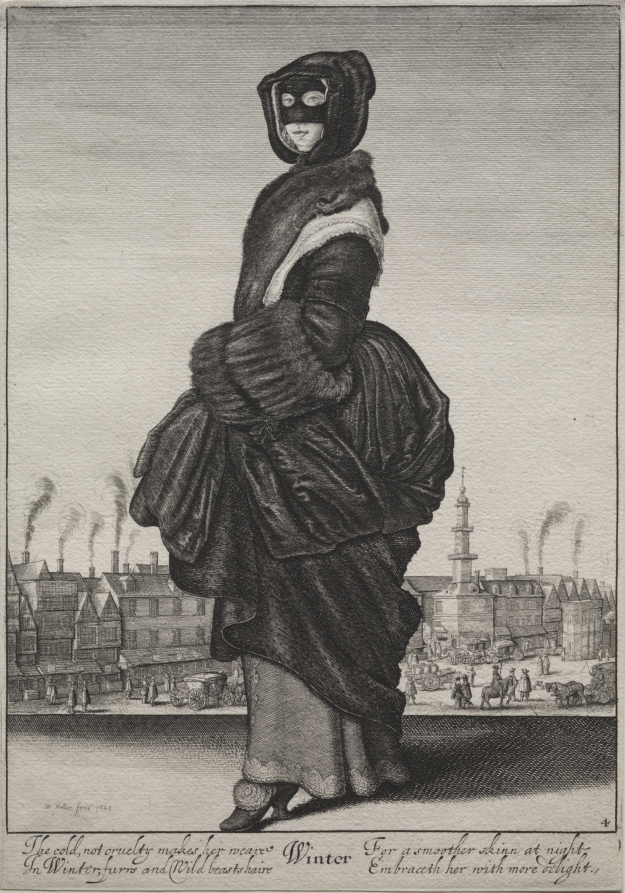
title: Winter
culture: Bohemia, 17th century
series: The Seasons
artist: Wenceslaus Hollar (Bohemian, 1607–1677)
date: 1643–44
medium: etching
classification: Print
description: Increments of time, such as the seasons, were one of the most popular subjects for printed sets. Wenceslaus Hollar alone made six different versions. Hollar was a professional printmaker with over 3,000 prints to his credit. Born in Bohemia, he worked in Germany, London, and Antwerp. He came to London in 1636 while in the employ of the Earl of Arundel, an important collector that Hollar met in Germany. Apparently free to pursue independent projects, Hollar designed and etched this series around 1643–44. Here, each season is personified by elegantly clad ladies, appropriately dressed for their particular climate, with recognizable landmarks in and around London in the backgrounds. The inscriptions, in an older version of English, are slightly suggestive, in keeping with the lighthearted character of the imagery. The building on the extreme right is the Tun. It was built in 1283 and served as a lockup for drunks and other public offenders. The inscription reads: "The cold, not cruelty makes her wear / In Winter, furs and Wild beasts hair / For a smoother skin at night, / Embrace her with more delight."